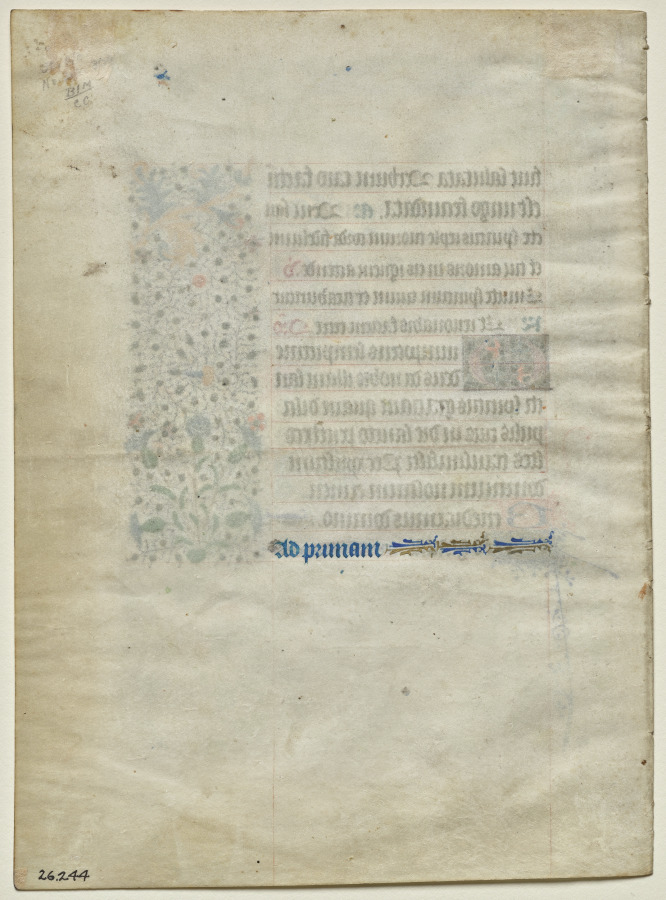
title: Bifolio from a Book of Hours: The Crucifixion: Hours of the Cross (recto)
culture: France, Angers, Nantes, or Poitiers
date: c. 1435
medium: ink, tempera, and gold on vellum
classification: Manuscript